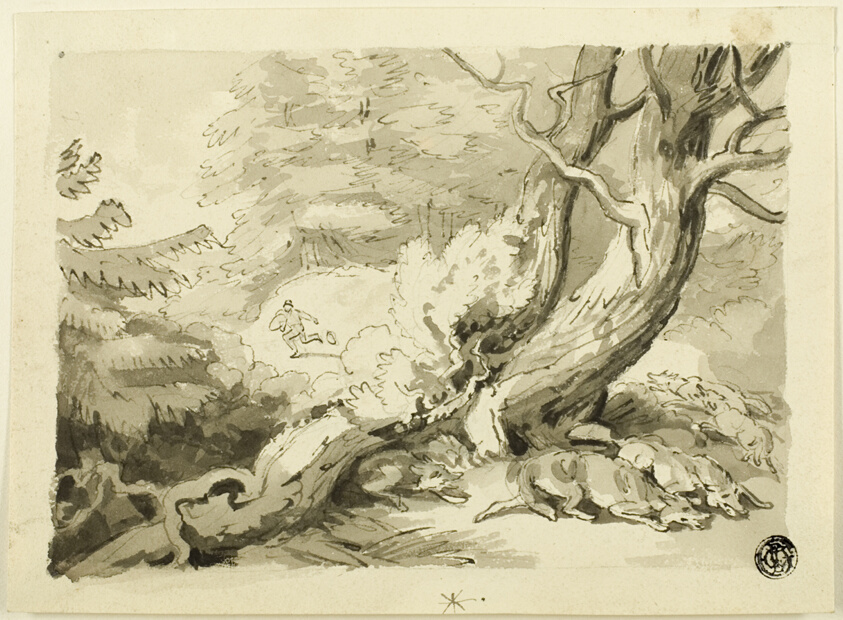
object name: Drawing and Watercolor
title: Fox Hunt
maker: Attributed to Samuel Howett; English, c. 1765-1822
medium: Pen and black ink, with brush and gray wash, over graphite, on cream wove paper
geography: England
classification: ink or chalk wash; drawings (visual works); prints and drawing